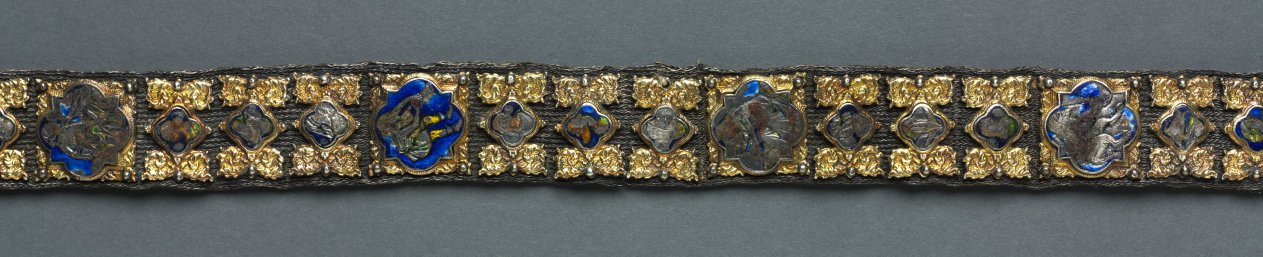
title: Belt for a Lady's Dress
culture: Italy, Siena(?)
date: c. 1375–1400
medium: basse-taille enamel and gilding on silver, silver thread, gilt-silver buckle, cast and chased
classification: Jewelry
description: Because of its extraordinary richness, this belt (also known as a girdle) was both an ornament for the body and an object of great personal luxury. Almost eight feet in length, belts like this were at the height of fashion for both men and women. After being passed around the waist and through the buckle, one end of the belt would fall to the hem of the garment. The belt's many colorful enamel plaques are worked in translucent enamel over decoration engraved into the silver beneath (an enameler's technique known as basse-taille). Within the plaques and cast into the buckle are scenes of courtly love, musicians, and fantastic animals. A large number of translucent enamels were made for secular objects during the late Middle Ages for use on jewelry, cups, garment clasps, and similar objects. This belt is a rare survival among these now scarce objects.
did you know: Look closely at the tiny scenes of courtly love on the plaques that adorn this belt. Given their size, these scenes were designed for the enjoyment of the woman who wore this belt over a sumptuous dress rather than an admirer from a distance.